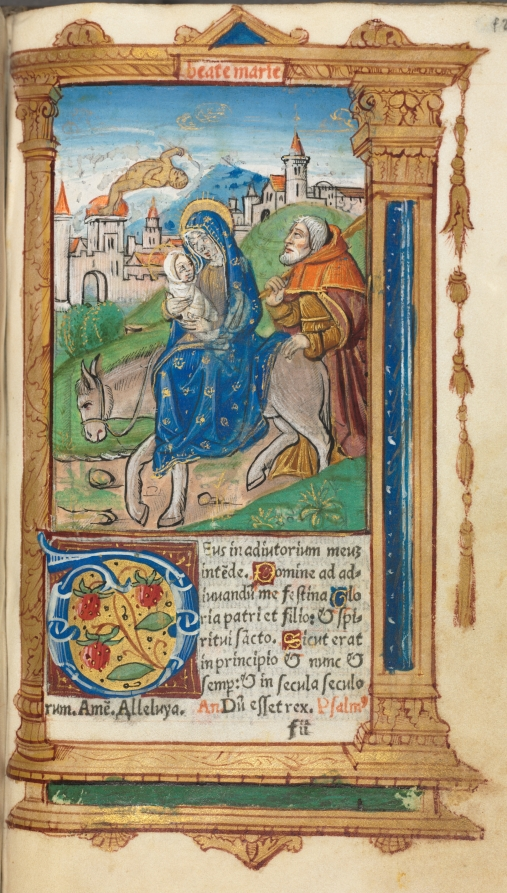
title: Printed Book of Hours (Use of Rome): fol. 42r, Flight into Egypt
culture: France, Paris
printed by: Guillaume Le Rouge (French, Paris, active 1493–1517)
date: 1510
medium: 112 Printed folios on parchment, bound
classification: Bound Volume